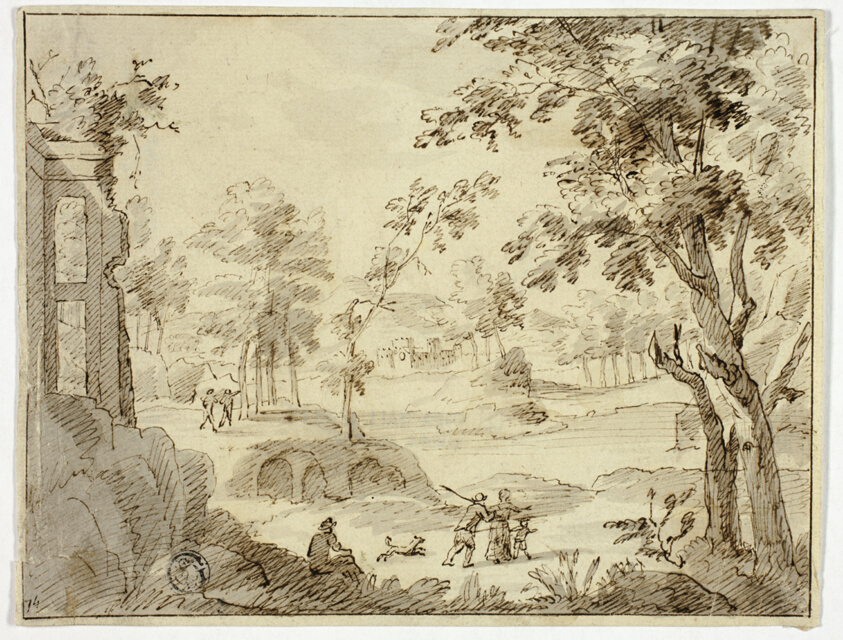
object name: Drawing and Watercolor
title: Figures in Landscape with Ruins and Castle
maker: Style of Gaspar van Wittel (Flemish, 1652-1736)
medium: Pen and brown ink, with brush and gray wash, on cream laid paper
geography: Flanders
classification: pen and ink drawings; drawings (visual works); prints and drawing